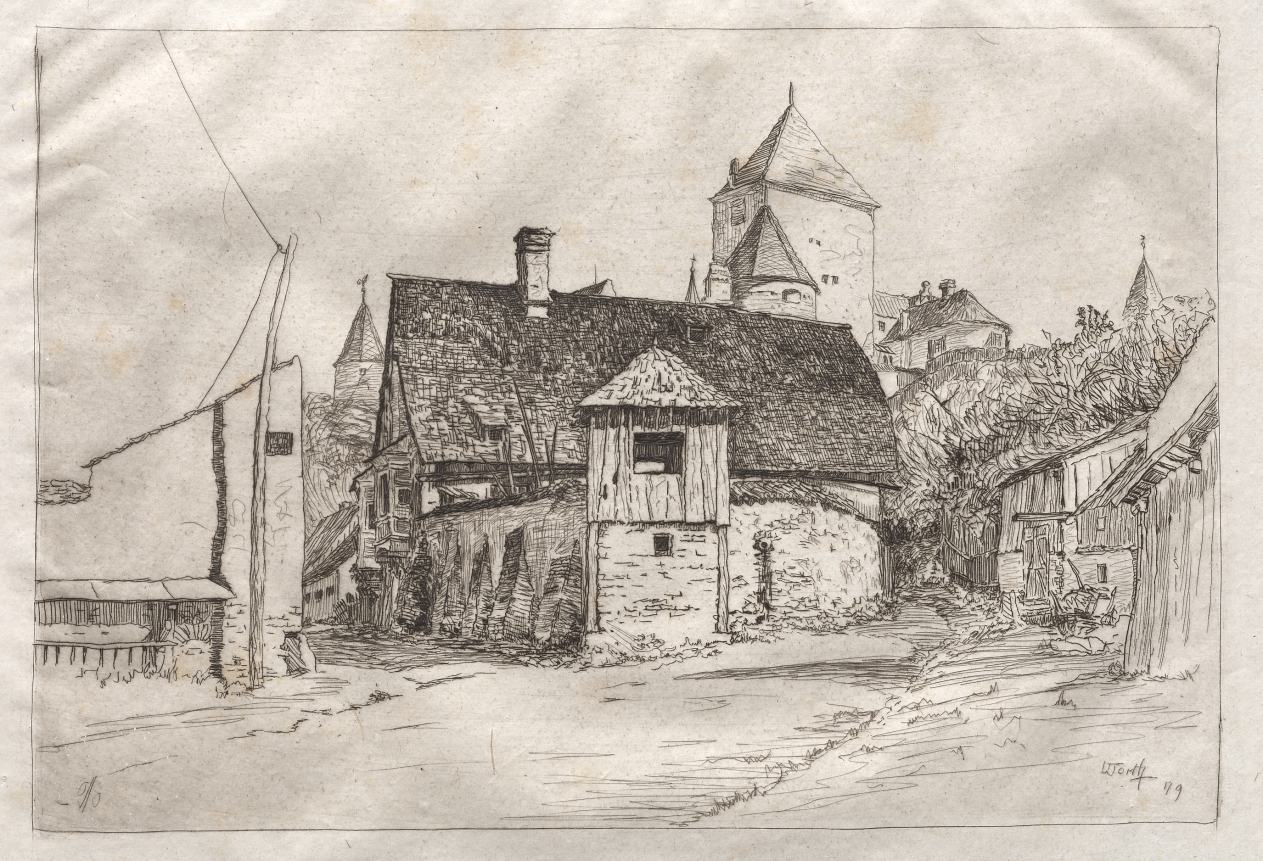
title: Worth: A Lane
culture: America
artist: Otto H. Bacher (American, 1856–1909)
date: 1879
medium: etching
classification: Print